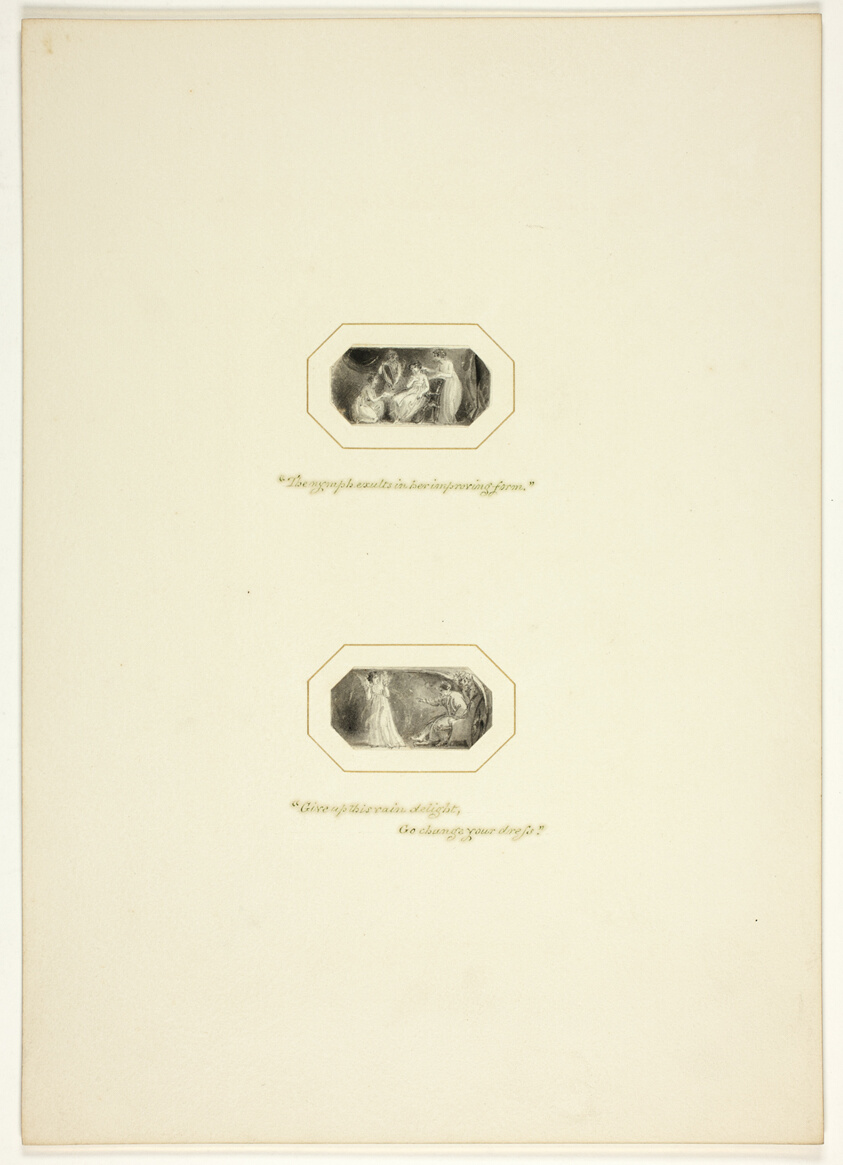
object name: Drawing and Watercolor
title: Study for a plate from The Triumphs of Temper, in the 1796 Royal Engagements Pocket Book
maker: Thomas Stothard (English, 1755-1834)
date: c. 1795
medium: Ink wash on paper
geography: England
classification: ink or chalk wash; drawings (visual works); prints and drawing